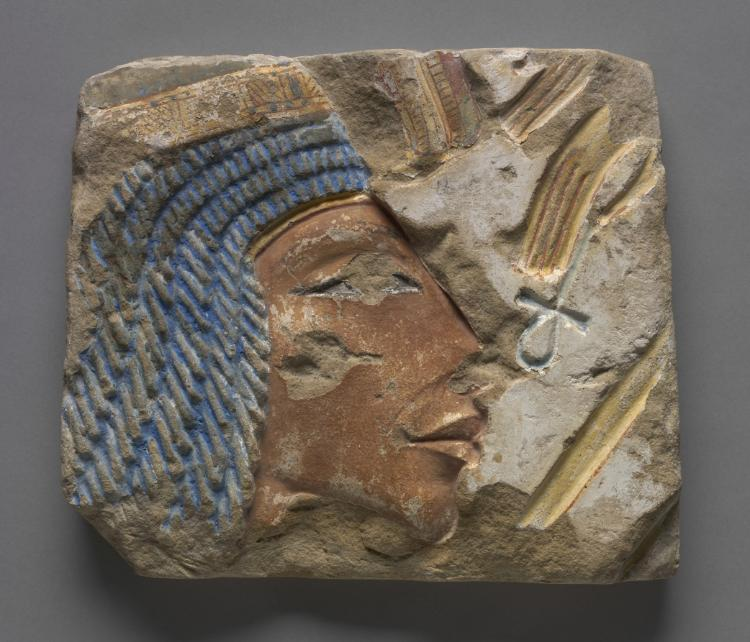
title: Talatat: Portrait of Nefertiti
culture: Egypt, Karnak, New Kingdom (1540–1069 BCE), Dynasty 18, reign of Akhenaten (1351–1334 BCE)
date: c. 1353–1347 BCE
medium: painted sandstone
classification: Sculpture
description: The son of Amenhotep III, Akhenaten, brought about the short-lived "monotheistic" revolution in Egyptian religion near the end of Dynasty 18. The young king constructed a temple complex to the Aten, the Sun Disk, at Karnak—from which this relief comes—before he moved his capital to El Armana. For reasons yet unknown, the figure of the Queen Nefertiti appears in these reliefs far more often than that of the king. Ironically, the Aten temples were dismantled anciently to be used as foundations and fill for additions to the Great Temple of Amun, whom the Aten had briefly displaced.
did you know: Even though all we see is a fragment of the head we know it is Nefertiti by the double uraeus or serpent symbol on the headband, which was only worn by the queen.